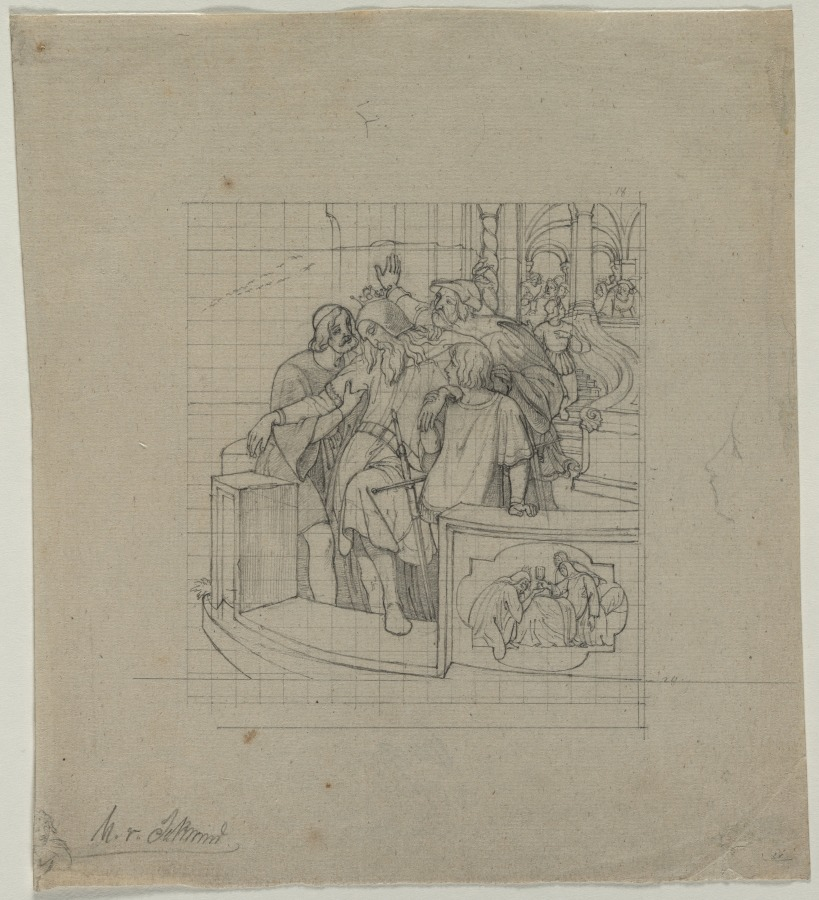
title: The King of Thule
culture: Germany, 19th century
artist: Moritz von Schwind (German, 1804–1871)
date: second or third quarter 1800s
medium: graphite; squared in graphite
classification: Drawing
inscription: signed, lower left, in graphite: M. v. Schwind [underlined] ; by artist, upper right, in graphite: 18 ; by artist, lower right, in graphite: 20 ; lower right, in graphite: 20 [underlined] ; VERSO, lower center, in graphite: 629 ; lower center, in graphite: Passonpartous